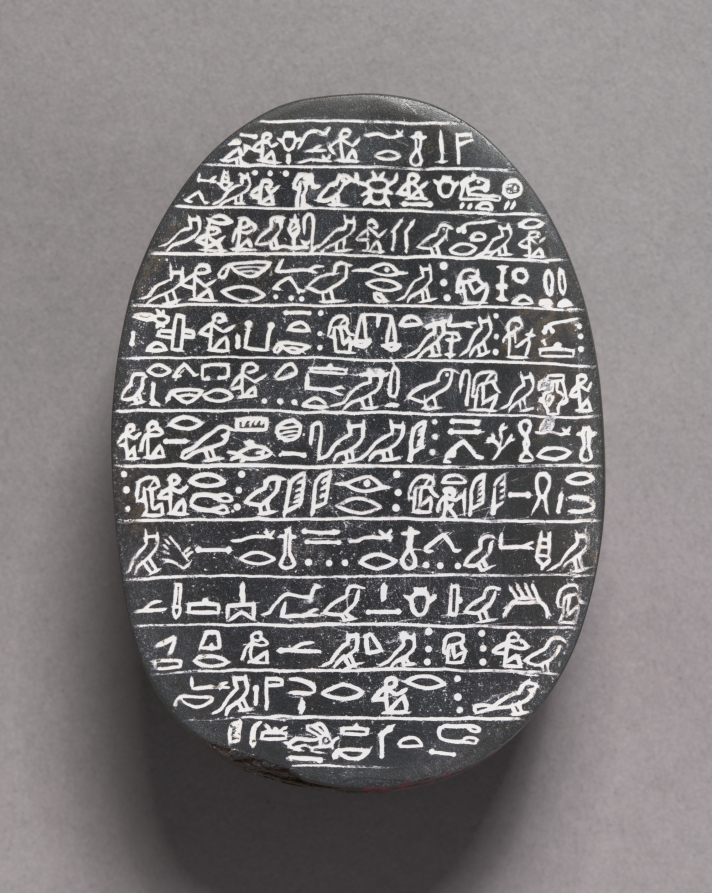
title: Heart Scarab of Nefer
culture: Egypt, New Kingdom (1540–1069 BCE), Dynasty 18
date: 1540–1296 BCE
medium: graywacke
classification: Scarabs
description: The design features in these objects borrow various ancient Egyptian funerary elements. The scale illustrated on top of the Cartier vanity case refers to the scale used in Osiris’s final judgment of the deceased. Amulets like the heart scarab were essential to the mummification process. They were placed throughout the mummy’s wrappings to protect the deceased during their journey in the afterlife. These inspired the Dior brooch seen on the model here. The ancient Egyptians believed amulets carried spells and that some, like the heart scarab, could sway opinions during the final judgement to help the deceased get to their version of heaven, called Iaru.